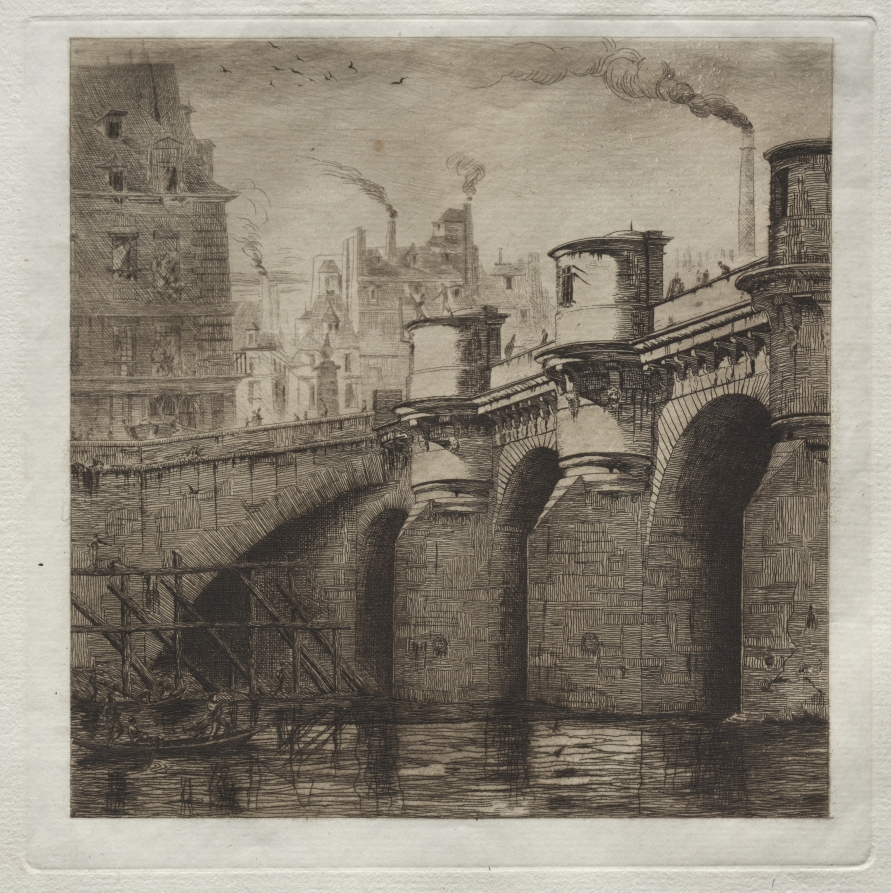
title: Le Pont Neuf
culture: France, 19th century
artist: Edmond Gosselin (French)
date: c. 1881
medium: etching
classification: Print